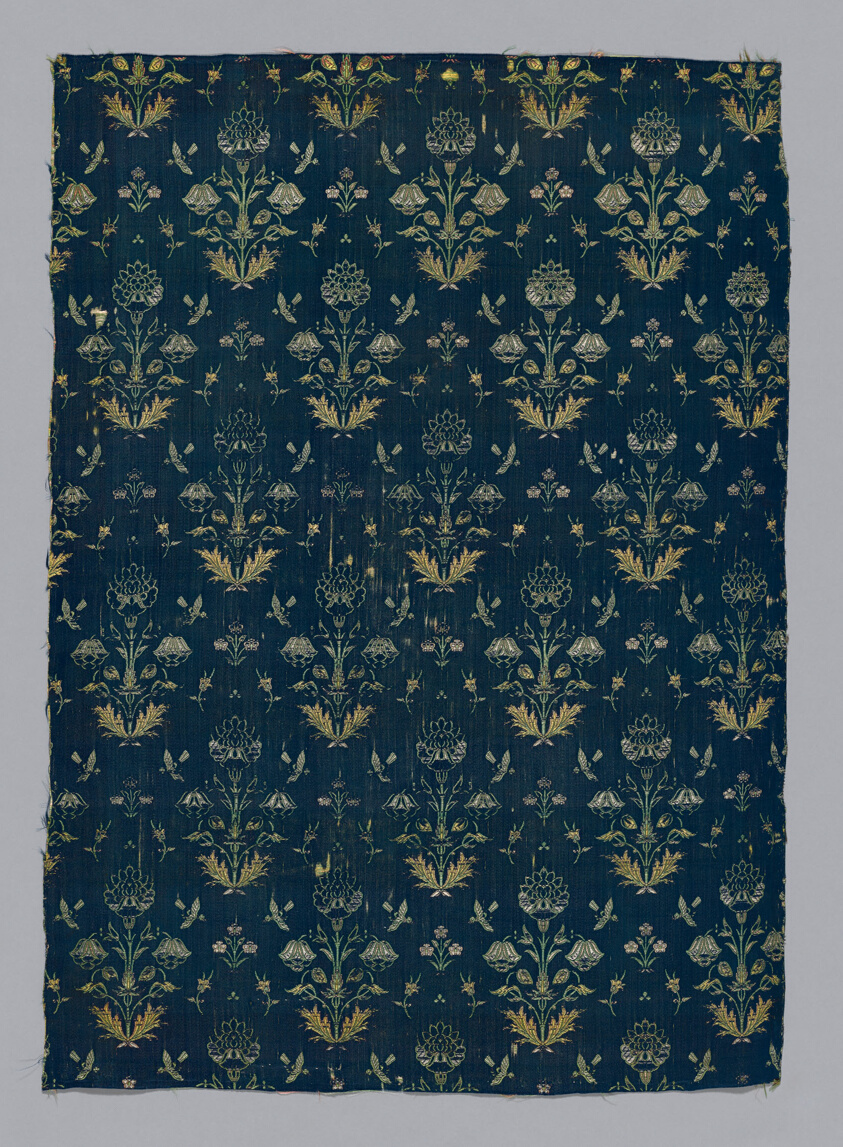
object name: Textile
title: Fragment (Dress Fabric)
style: kashan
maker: Iran, probably Kashan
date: 18th century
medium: Silk, satin weave with secondary binding warps and self-patterning wefts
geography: Iran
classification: textile; weaving